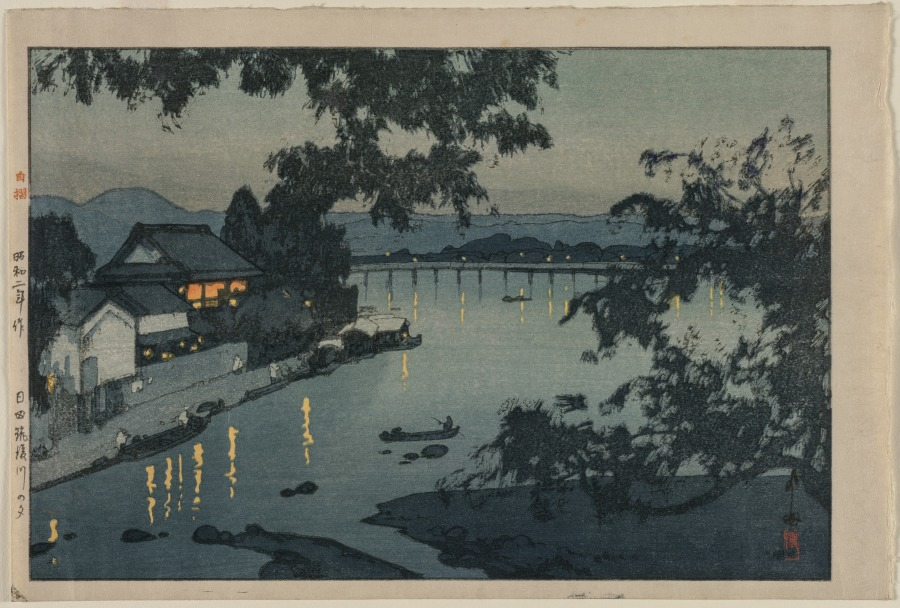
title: Evening on the Chikugo River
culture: Japan, Shōwa period (1926–89)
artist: Yoshida Hiroshi (Japanese, 1876–1950)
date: 1927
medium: Woodblock print; ink and color on paper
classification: Print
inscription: Signature: Yoshida Artist Seal: Hiroshi Engraver: Yoshida (jizuri stamp at upper right)